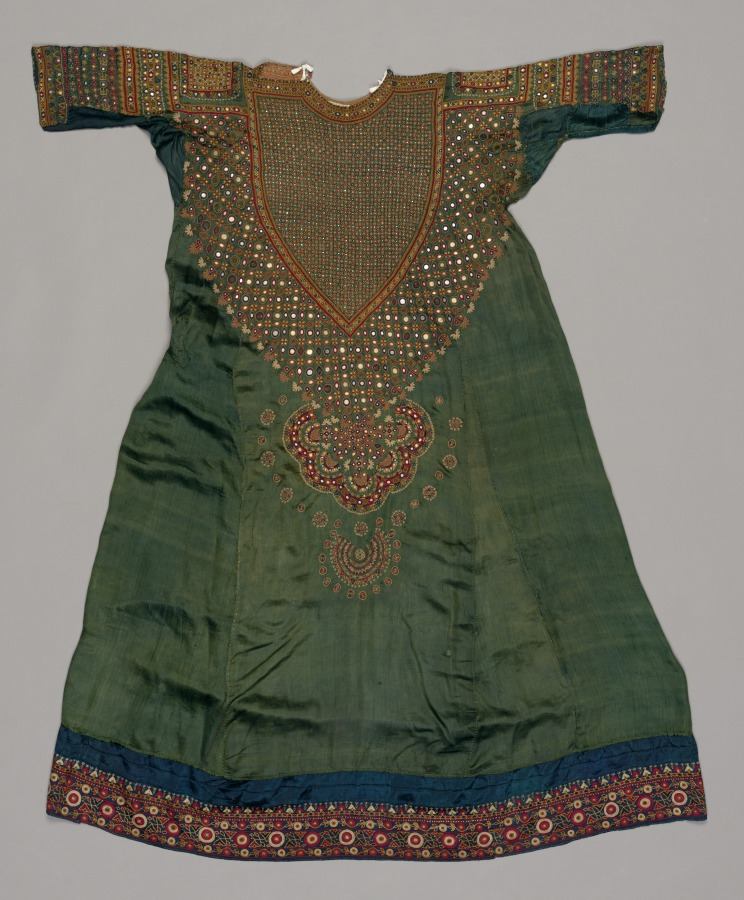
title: Jat Woman's Dress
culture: Western India, Gujarat, possibly Kutch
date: 1800s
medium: silk embellished with mirror work and embroidered with silk in open-chain, stem, basket, and running stitch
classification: Garment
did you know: Pieces of mirror, called abhla in Hindi or shisha in Persian, were favorite embellishments to embroideries and accessories in western India and Afghanistan.